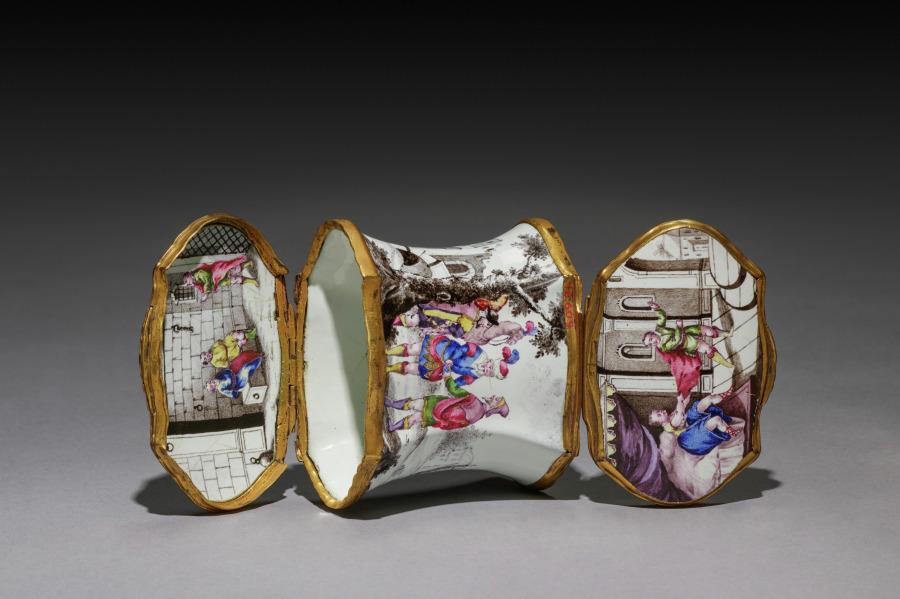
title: Box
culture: Germany, Augsburg, 18th century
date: c. 1730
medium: enamel on copper with metal mounts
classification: Miscellaneous